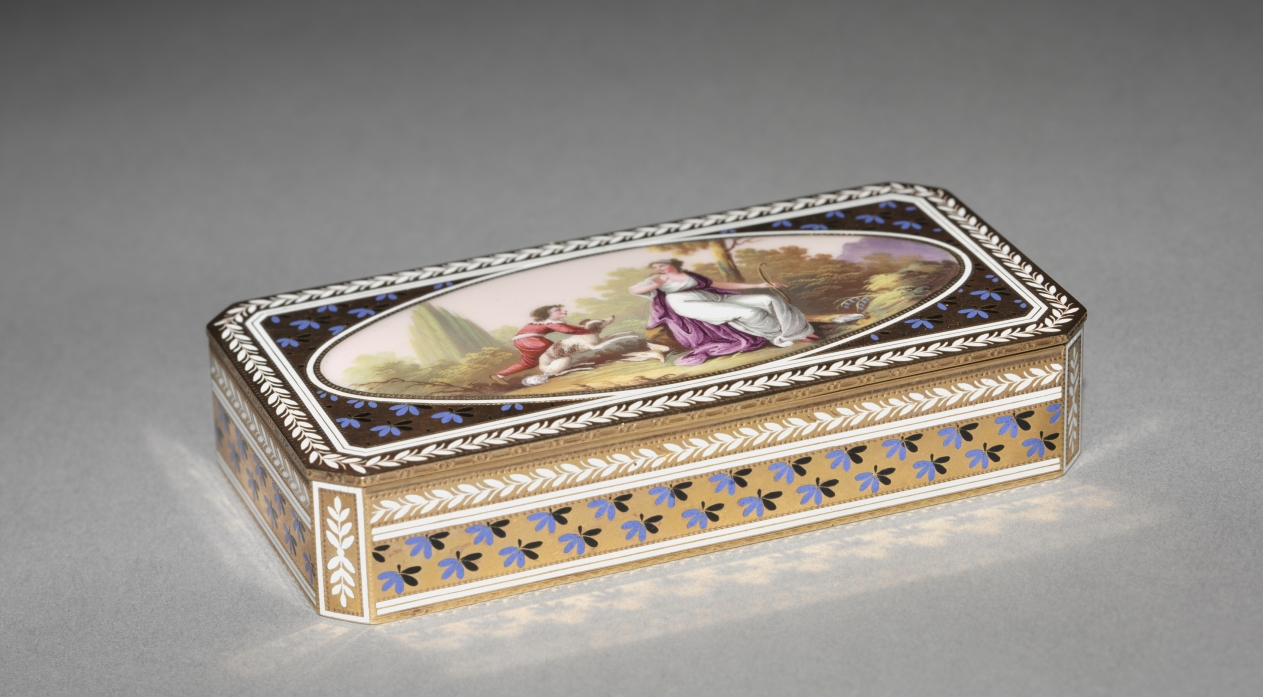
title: Box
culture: Switzerland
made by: probably by F. Joanin (Swiss)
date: c. 1810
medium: gold and enamel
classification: Miscellaneous